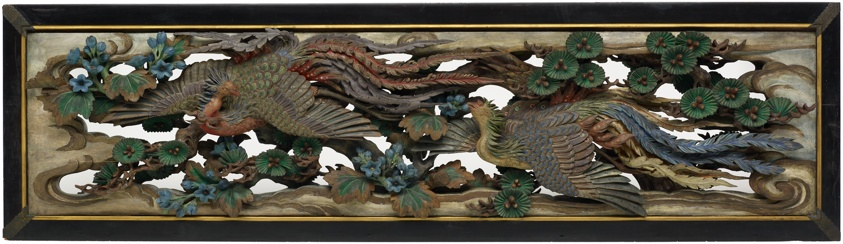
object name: Architectural fragment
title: Transom panels (ramma) from the Phoenix Pavilion (Hōōden)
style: Japanese (culture or style)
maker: Takamura Kо̄un (Japanese, 1852-1934)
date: 1893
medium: Wood with polychromy; panel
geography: Japan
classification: wood; architectural fragment